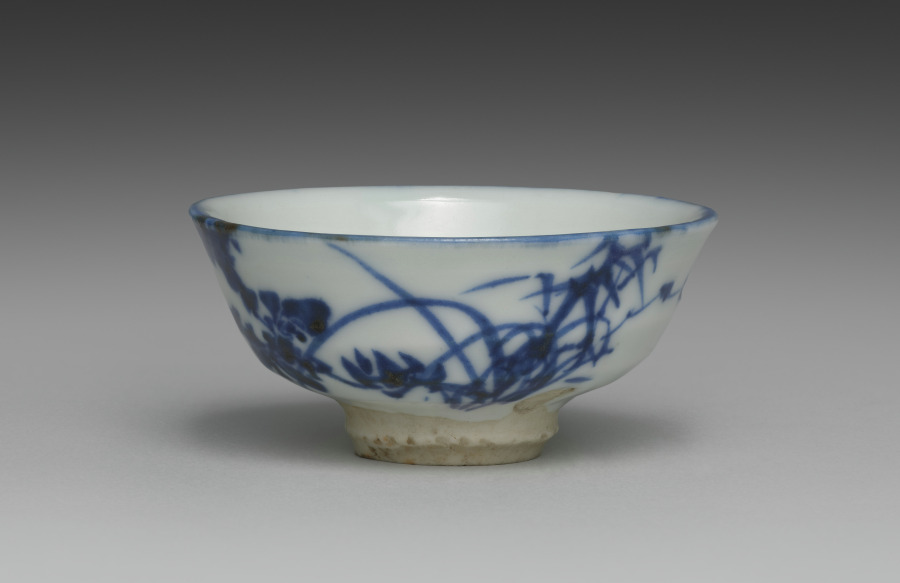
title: Sake Cup with Auspicious Plants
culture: Japan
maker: Seifū Yohei II (Japanese, 1844–1878)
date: 1861–78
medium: One of a pair of sake cups; porcelain with underglaze blue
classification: Ceramic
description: Seifū Yohei II excelled as a painter, as evidenced by his floral and landscape designs. His works were selected as the best among Kyoto ceramics shown to jurists from Europe and the US, thus paving the way for international recognition of the studio in the late 1800s.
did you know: Orchid, bamboo, chrysanthemum, and plum all appear on this cup and have associations with the four seasons.